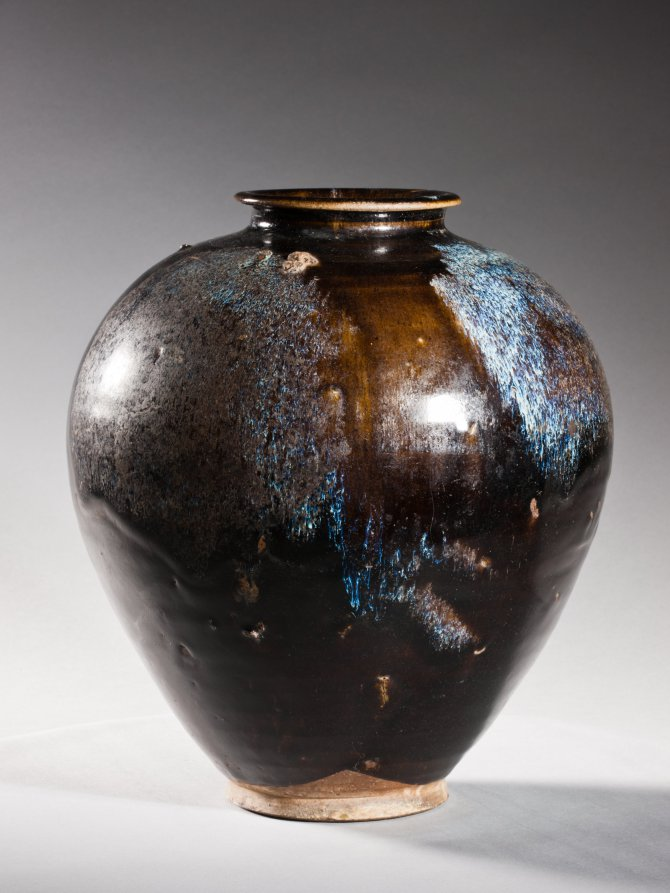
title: Jar: Black Ware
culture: China, Henan province, Huangdao kilns, Tang dynasty (618-907)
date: 700s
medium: glazed stoneware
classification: Ceramic